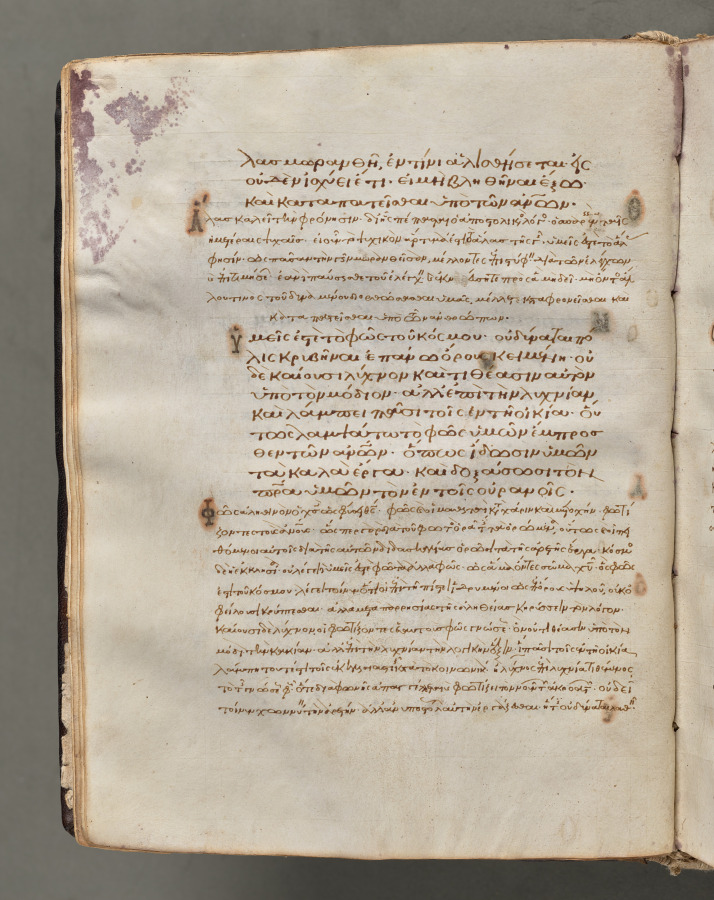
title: Text, folio 19 (verso), from a Gospel Book with Commentaries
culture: Byzantium, Constantinople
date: c. 1000–1100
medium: ink, tempera, and gold on vellum; leather binding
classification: Bound Volume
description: Each of the four gospels in this book opens on a page with brilliantly illuminated borders depicting the author of the text as well as birds-principally peacocks, symbols of the immortality of the soul-and fountains, representing the fountain of life and the salvation of the soul. This volume consists of 428 leaves with texts in Greek. Its level of sophistication suggests that it was probably written and decorated in a monastery in Constantinople.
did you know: Gospel Books were carried in procession through Byzantine churches.